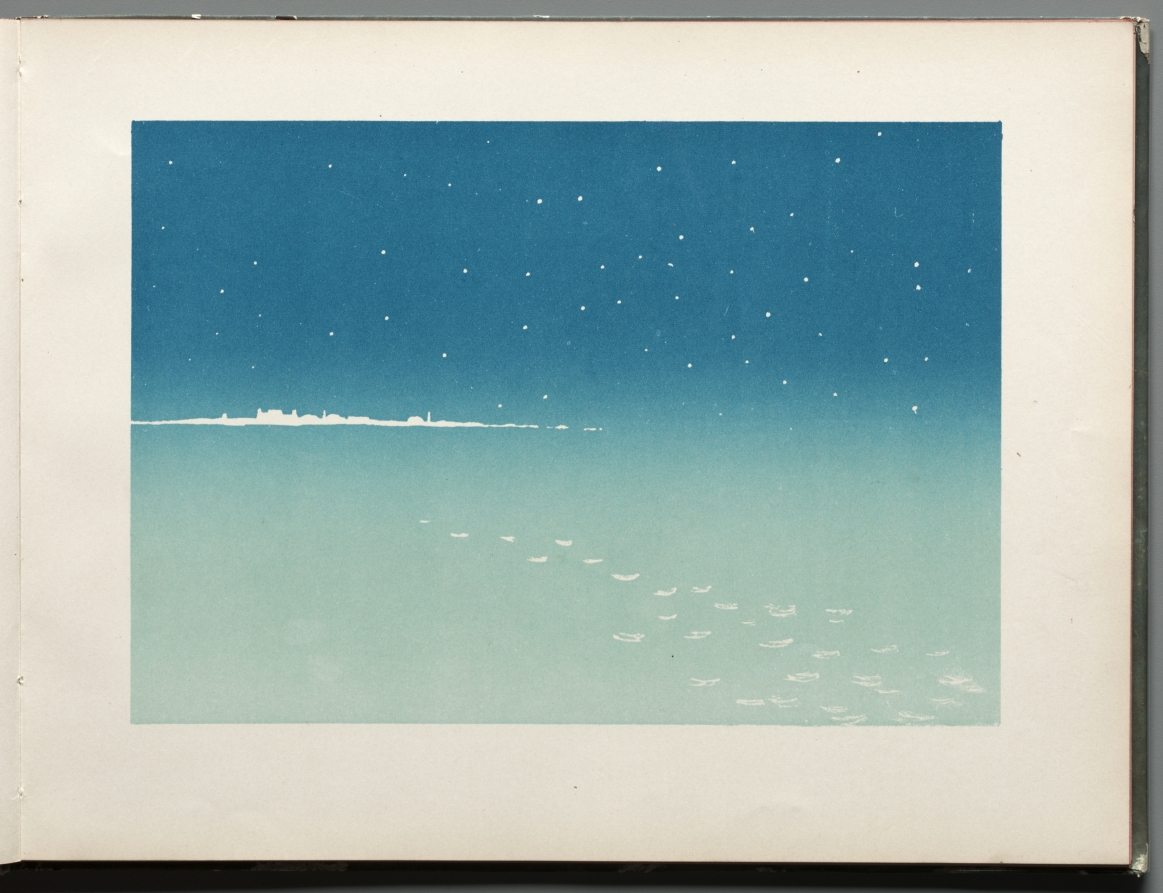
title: The Progress of the Stars: Overture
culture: France, 19th century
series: Bound Volume illustrating the poetry and music of Georges Fragerolle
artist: Henri Rivière (French, 1864–1951)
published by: C. Marpon & Flammarion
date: 1890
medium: 18 color lithographs in a Bound Volume illustrating the poetry and music of Georges Fragerolle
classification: Bound Volume